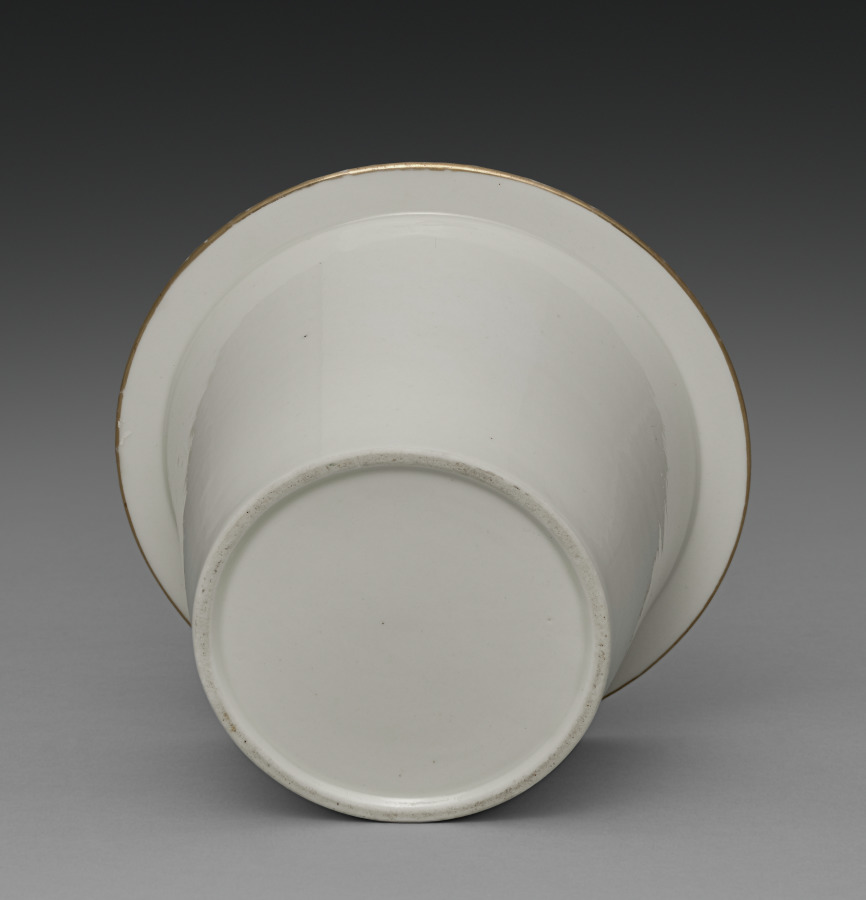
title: Liner for an Ice Cream Pail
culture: France, Paris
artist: Factory of Jacob-Petit (French, 1830–1865)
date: c. 1840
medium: gilt porcelain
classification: Ceramic